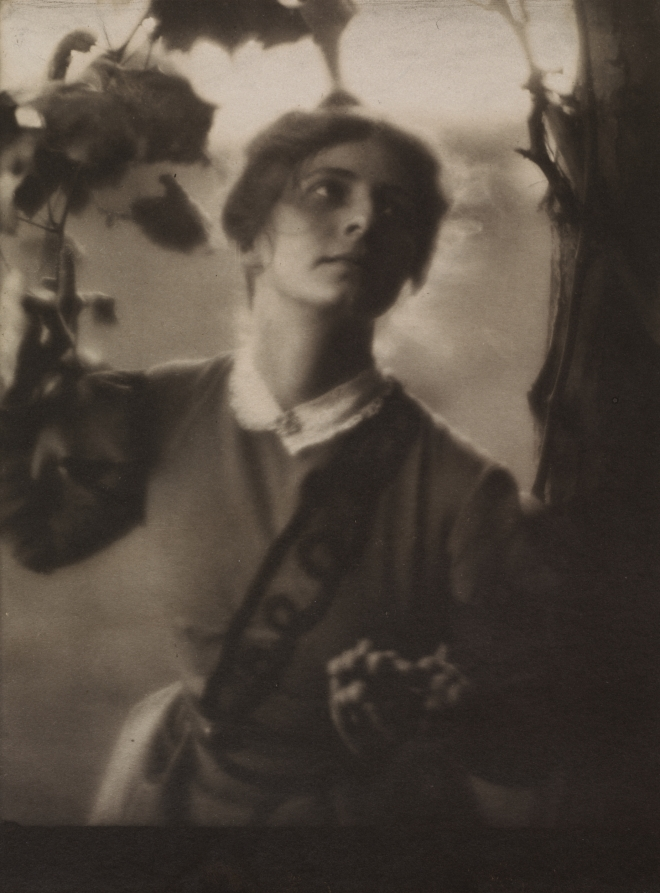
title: The Arbor (Julia Hall McCune)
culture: America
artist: Clarence H. White (American, 1871–1925)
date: 1906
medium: platinum print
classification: Photograph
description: Clarence Hudson White was a pioneer of the American pictorialist vision. For more than 25 years, he helped shape the style and, by extenstion, the direction of 20th-century photography through his work as a practitioner, leader, teacher, and mentor. He was primarily a family photographer, who enjoyed posing his family and friends in intimate interiors against a window or outdoors at dawn or dusk. He enhanced his negative's soft quality by printing on platinum paper, a medium that renders the middle tones of a print with great sensitivity. In this image, White posed one of his favorite models, Julia Hall McCune, a family friend and student, in an arbor. McCune appears lost in thought. Her face is partially bathed in a soft light that heightens the quiet, meditative mood of the scene.